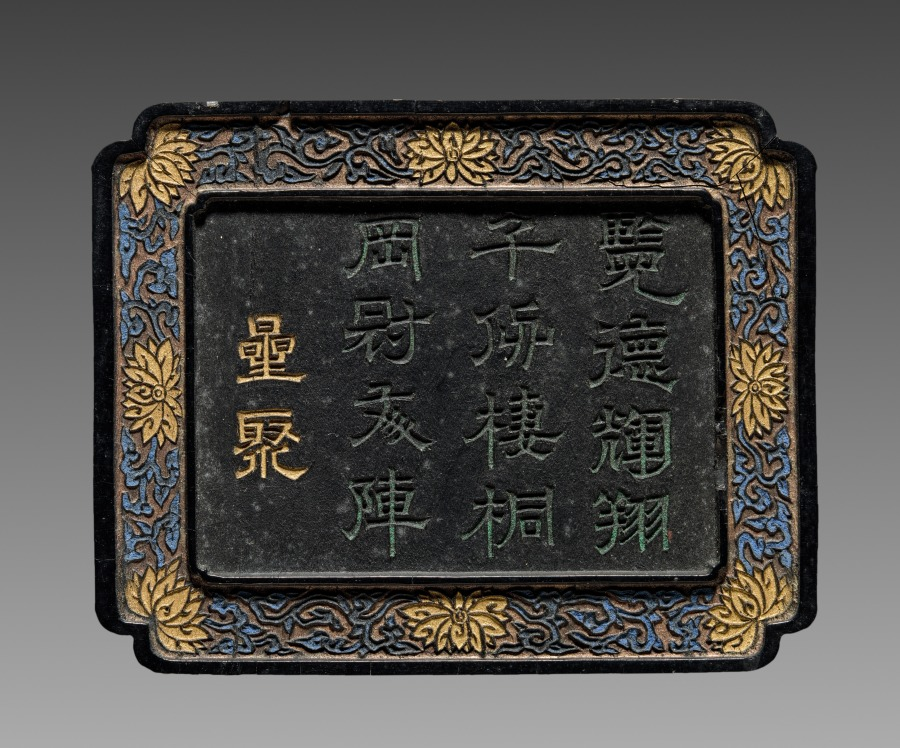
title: Ink Cake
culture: China, Qing dynasty (1644-1911)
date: 19th Century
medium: ink cake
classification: Miscellaneous